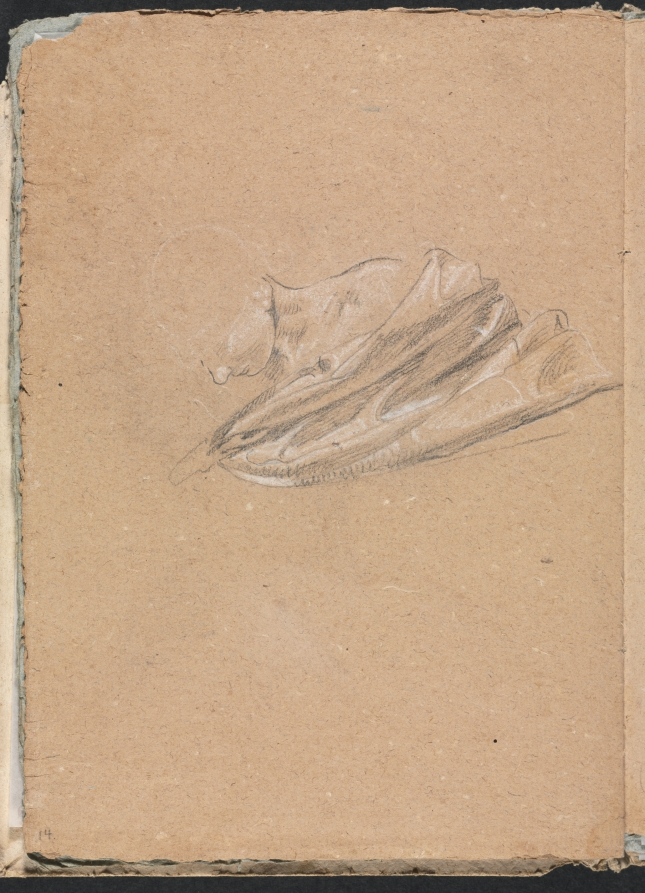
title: Verona Sketchbook: Head and shoulder with drapery (page 14)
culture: Italy, 18th century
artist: Francesco Lorenzi (Italian, 1723–1787)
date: 1760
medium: black chalk with white heightening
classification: Bound Volume